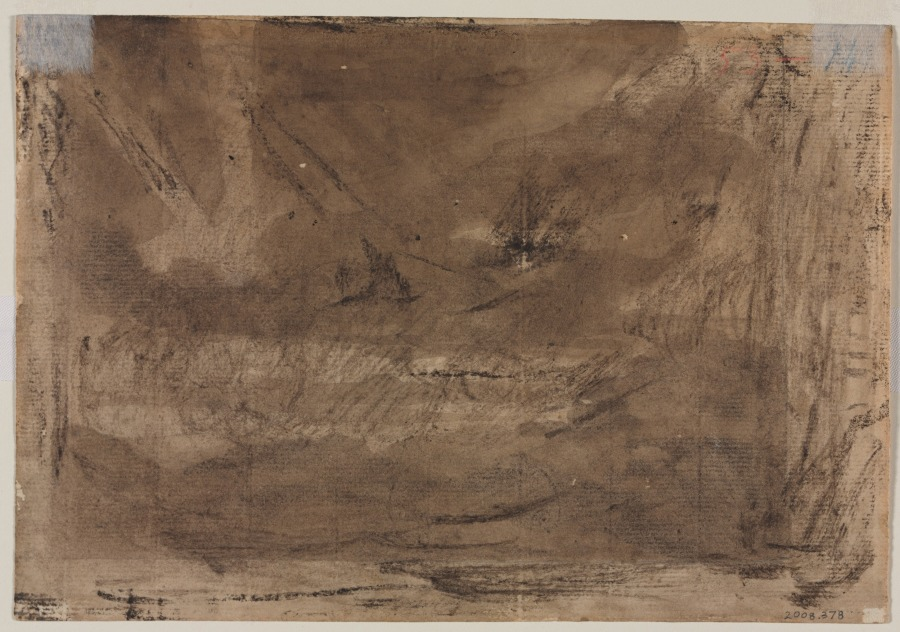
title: Compositional Study? (possibly for "Poussin’s Deluge") (verso)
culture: France, 19th century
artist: Théodore Géricault (French, 1791–1824)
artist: after Nicolas Poussin (French, 1594–1665)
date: c. 1816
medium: brown wash and black crayon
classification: Drawing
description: Géricault's drawing of a man clutching the mane of a horse as they struggle together to stay afloat is a direct copy of a detail from one of Nicolas Poussin's (1594-1665) most celebrated paintings, The Deluge, or Winter (see photo). Small in scale but monumental in feeling, the sheet exemplifies the artist's "antique manner" of drawing, which he began to develop around 1815. This style, with its heavy contour lines and broad washes, developed in tandem with Géricault's renewed interest in copying works of art from the past, such as prints after ancient sculpture and works by Raphael (1483-1520), Michelangelo (1475-1564), and Poussin.